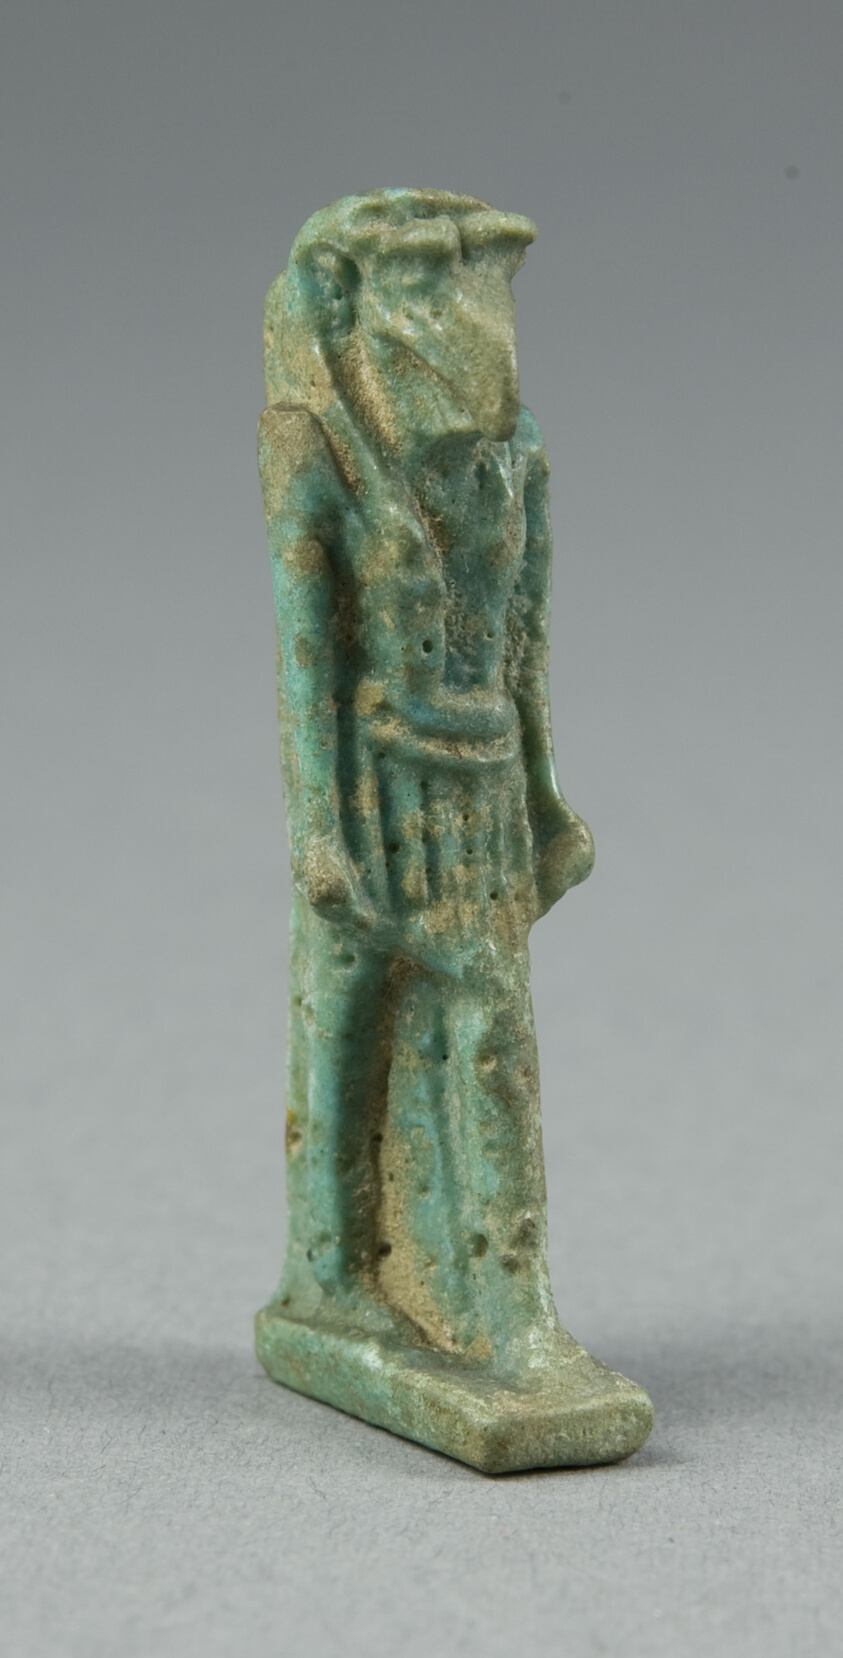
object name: Costume and Accessories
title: Amulet of the God Thoth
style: egyptian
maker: Egyptian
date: Late Period, Dynasties 26–31 (664–332 BCE)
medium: Faience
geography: Egypt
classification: amulet; jewelry; ceramics; ancient art; costume; faïence (composite material)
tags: gods (deities)